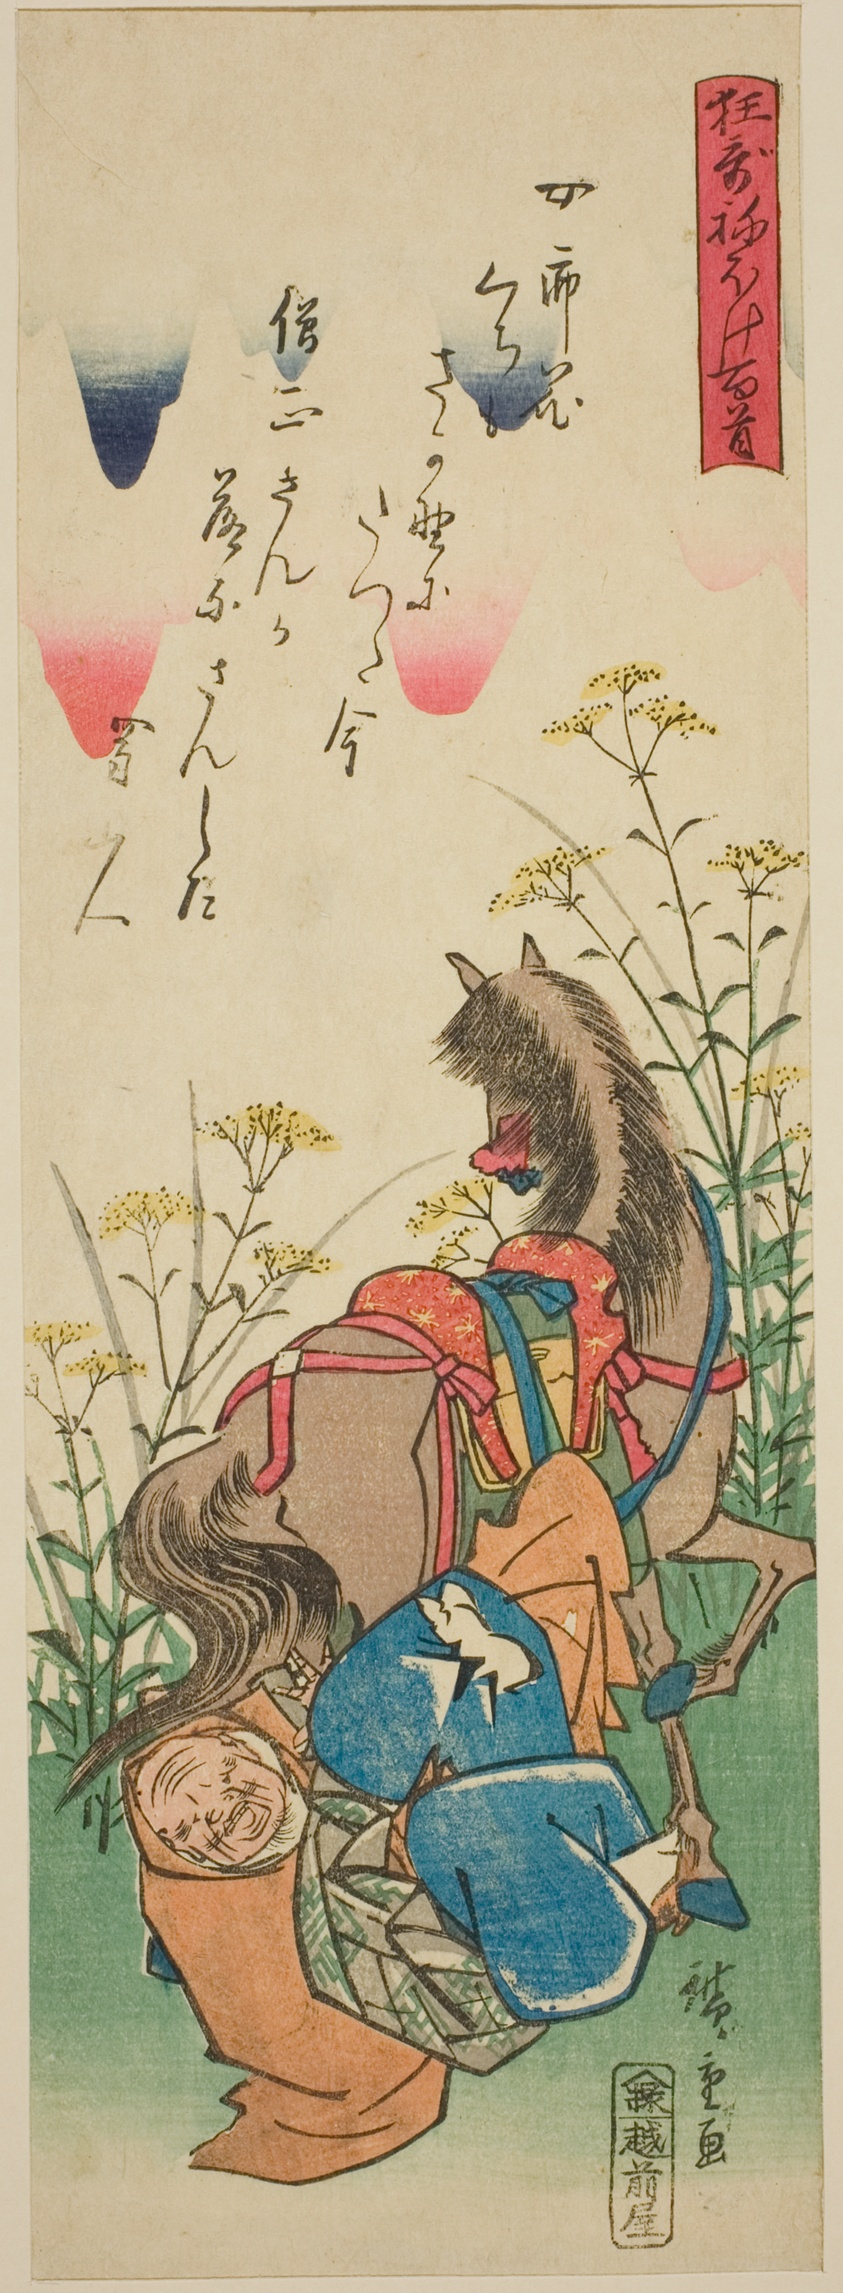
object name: Print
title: Sojo Henjo, from the series "One Hundred Satirical Poems (Kyoka neboke hyakushu)"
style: Japanese (culture or style)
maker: Utagawa Hiroshige 歌川 広重; Japanese, 1797-1858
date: 19th century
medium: Color woodblock print; chutanzaku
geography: Japan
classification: woodblock print; print; asian art